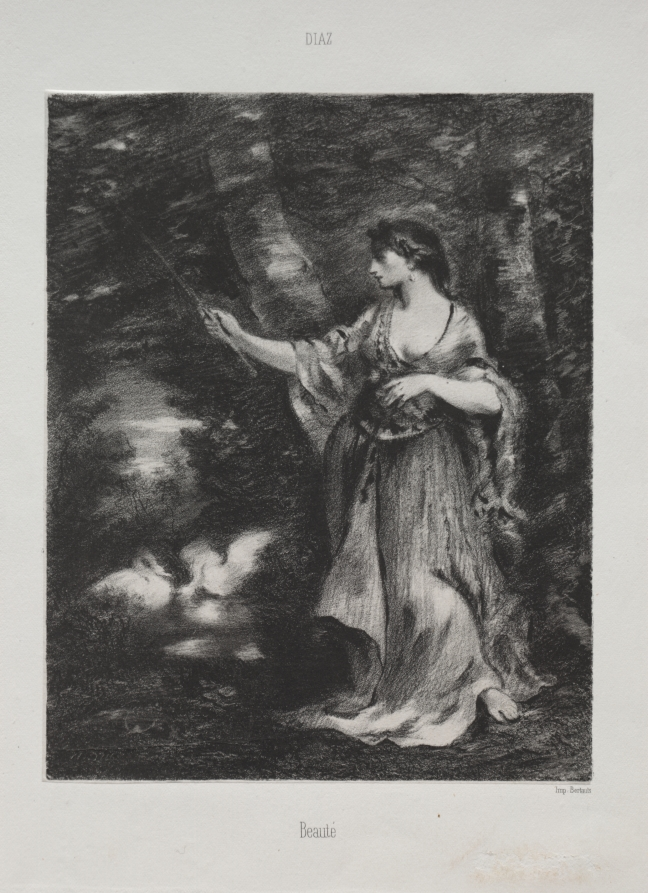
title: Beauté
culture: France, 19th century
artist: Narcisse Diaz de la Peña (French, 1807–1876)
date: c. 1849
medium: lithograph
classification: Print